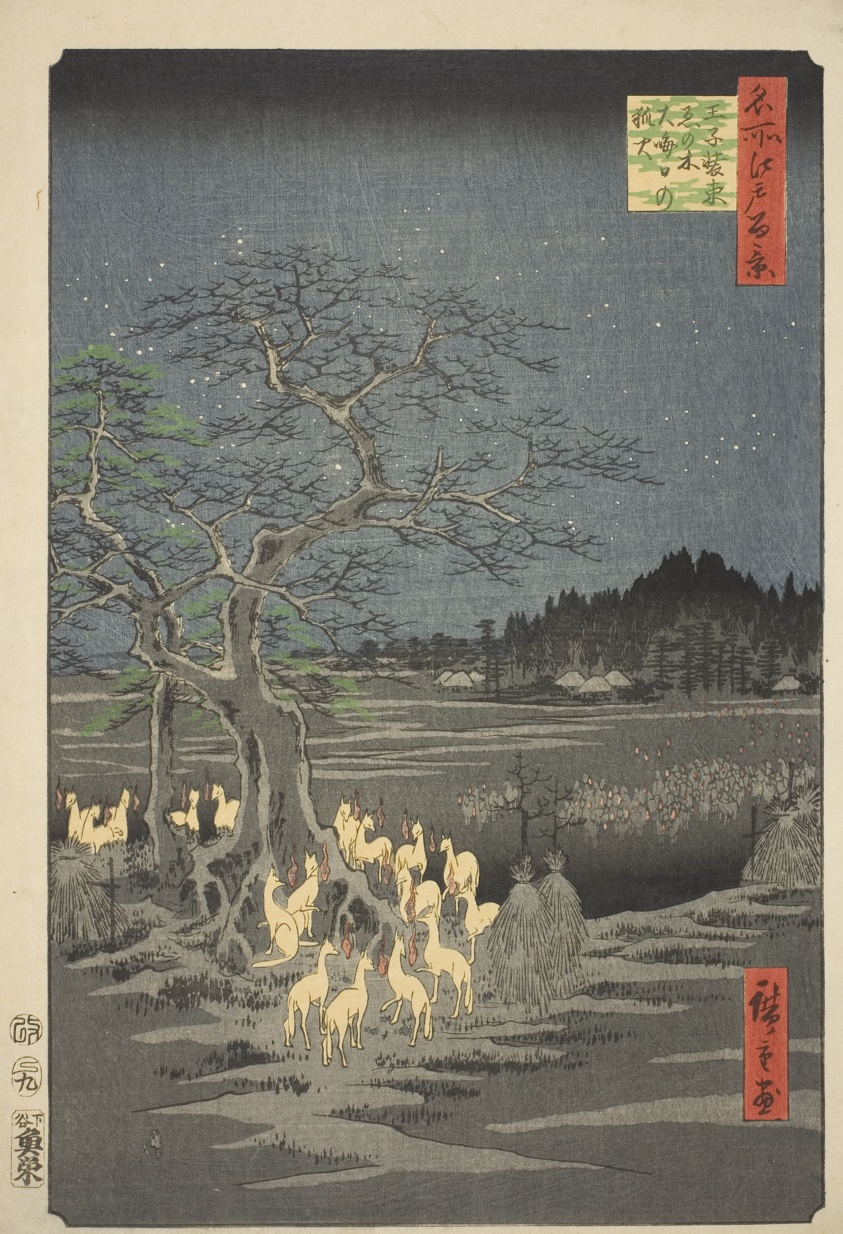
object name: Print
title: Fox Fires on New Year's Eve at the Changing Tree in Oji (Oji shozoku enoki omisoka no kitsunebi), from the series "One Hundred Famous Views of Edo (Meisho Edo hyakkei)"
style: Japanese (culture or style)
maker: Utagawa Hiroshige 歌川 広重; Japanese, 1797-1858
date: 1857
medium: Color woodblock print; oban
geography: Japan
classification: woodblock print; print; asian art